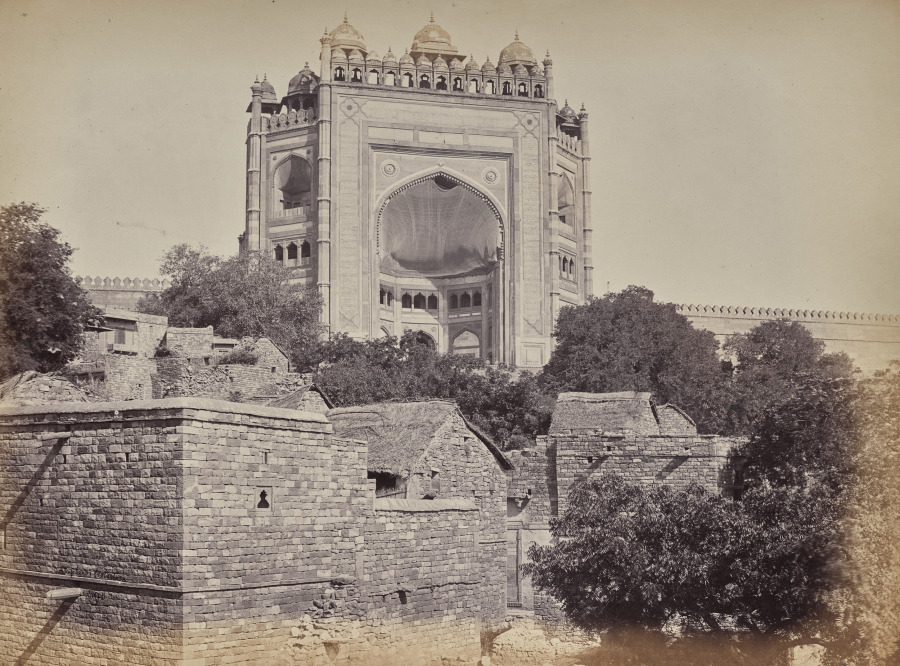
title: Futheypoor Sikre Guard Gate of the Fort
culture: England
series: Photographs of Northern India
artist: Samuel Bourne (British, 1834–1912)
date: 1863–70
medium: albumen print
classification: Photograph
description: The 50 images in this album, all taken in the 1860s, move from the hill towns of the Himalayas down to cities including Lahore (now in Pakistan), Delhi, Lucknow, Agra, Benares (now Varansi), and Calcutta (now Kolkata). Architectural studies of major monuments offer valuable historical records of what sites such as the Taj Mahal and the imperial mosque of the Mughal emperors in Delhi looked like before 20th-century restorations.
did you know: Samuel Bourne, the author of most the images in this album, was a banker in England before he moved to India to become a professional photographer.